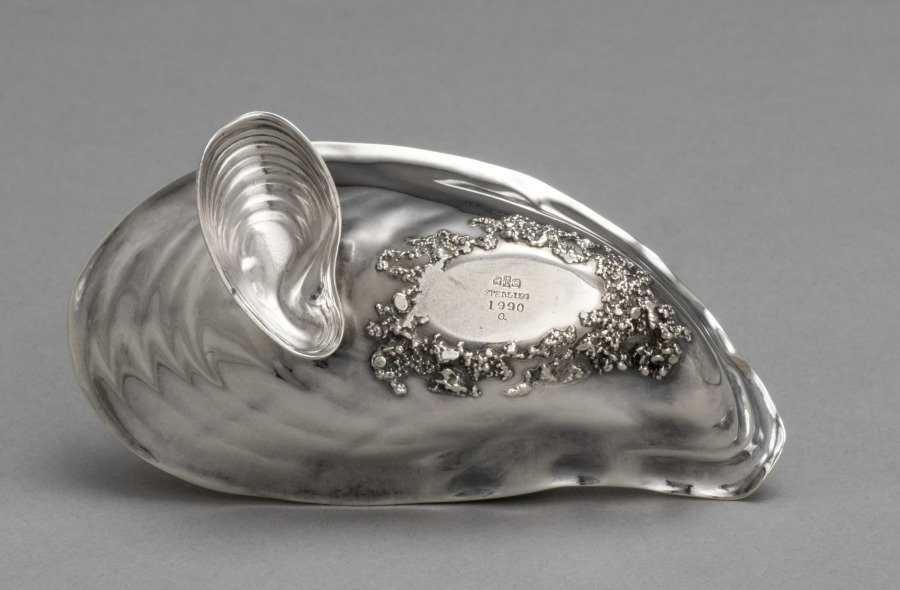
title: Seashell Salt with Shell and Crab Spoon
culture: America, Rhode Island, Providence, 19th century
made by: Gorham Manufacturing Company (America, est. 1831)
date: 1884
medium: handwrought sterling silver, partially gilt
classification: Silver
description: This small salt dish and spoon reflect the late 19th-century interest in incorporating naturalistic details into the design of useful pieces-in this instance probably inspired by Japanese examples.